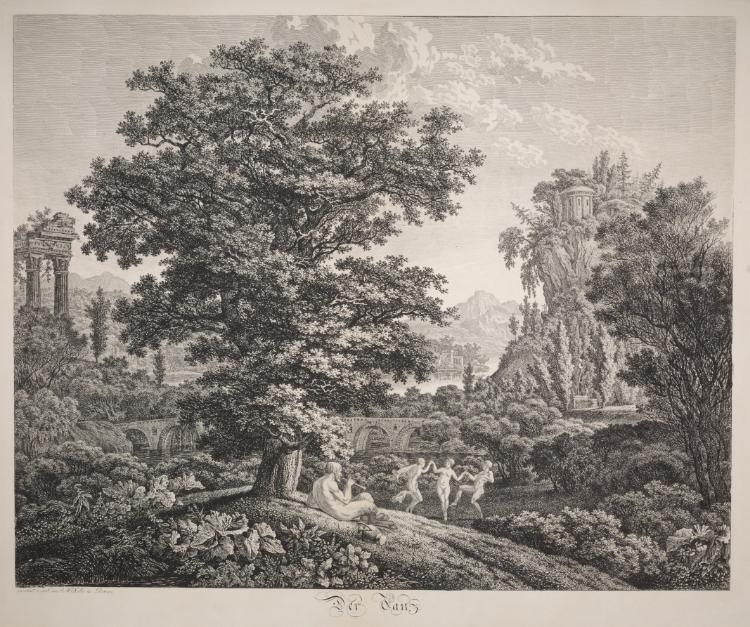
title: The Dance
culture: Germany, 18th-19th century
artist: Carl Wilhelm I Kolbe (German, 1757–1835)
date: 1799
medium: engraving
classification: Print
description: The Dance represents a stylistic fusion of classicism and scientific naturalism that dominated landscape art at the end of the 18th century. The circle of nudes dancing to a satyr’s music, ancient ruins, and sacrificial alter evoke a classical idyll, while the surrounding landscape, particularly the tree and foreground burdocks, are rendered with botanical precision.